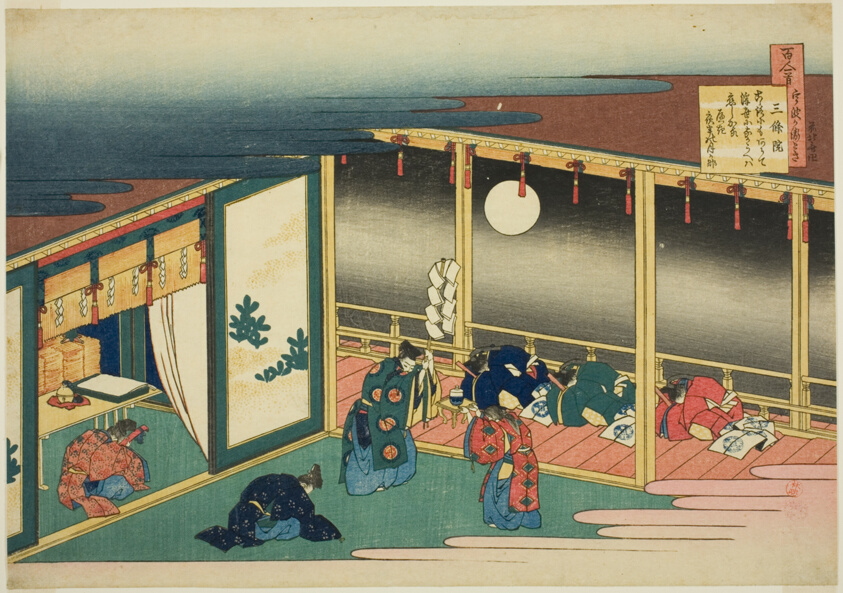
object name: Print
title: Poem by Sanjo-in, from the series "One Hundred Poems Explained by the Nurse (Hyakunin isshu uba ga etoki)"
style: Japanese (culture or style)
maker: Katsushika Hokusai 葛飾 北斎; Japanese, 1760-1849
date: c. 1835/36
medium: Color woodblock print; oban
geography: Japan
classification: woodblock print; print; asian art